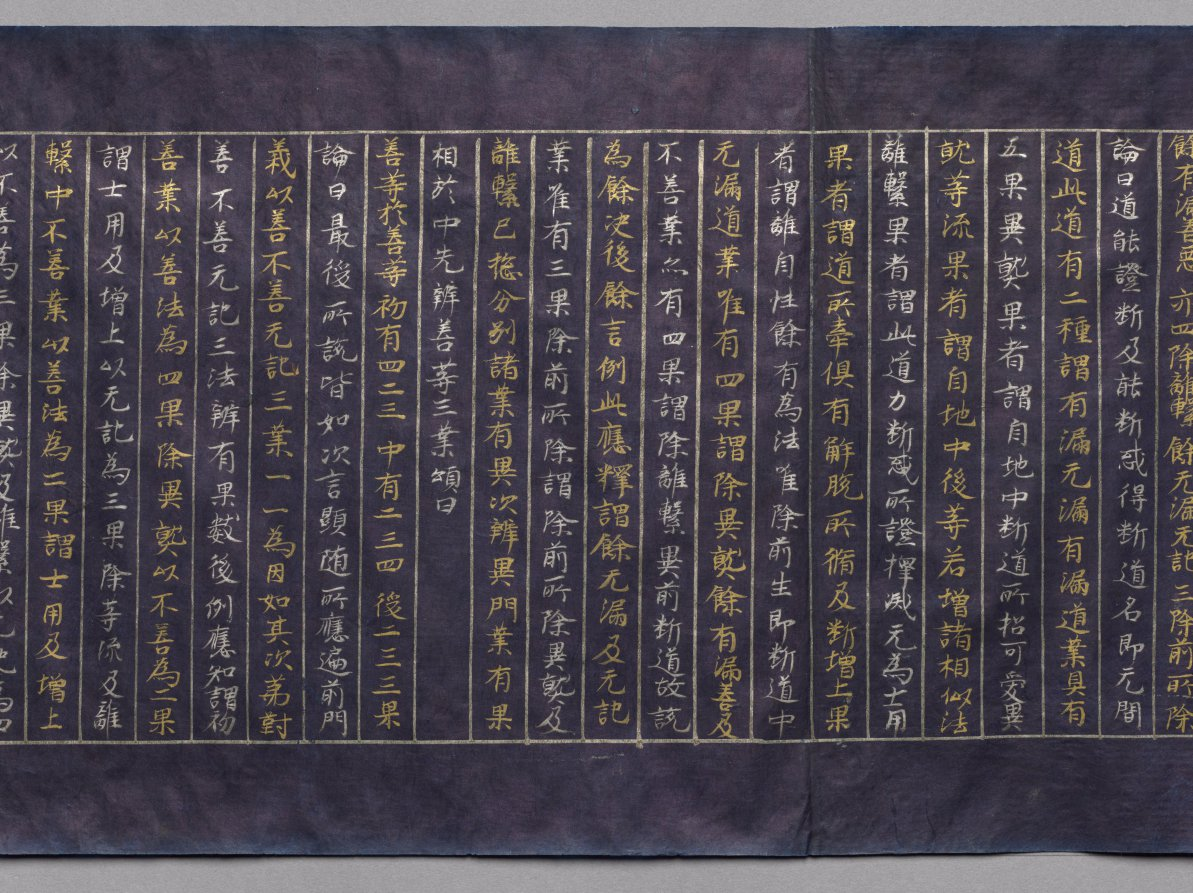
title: Meta-Discourse on the Teachings from the Treasury (Abidharmakosha-Bhashya)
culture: Japan, Heian period (794–1185)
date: 1100s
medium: handscroll; gold and silver on indigo-dyed paper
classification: Manuscript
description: This religious text relates some of the teachings of the great fourth-century Indian Buddhist scholar Vasubhandhu. The text analyzes human consciousness in its relationship to the environment and transformations that occur during meditation. This scroll is the 17th part of a 30-part translation of the text by Xuanzang, an eminent seventh-century Chinese monk.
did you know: The frontispiece depicts the Buddha Shakyamuni preaching in a paradisical landscape.